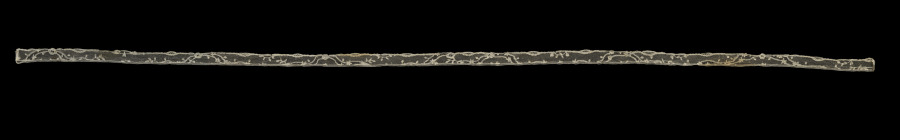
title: Lace Edging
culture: Belgium, Brussels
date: 1700s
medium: Bobbin lace with appliqué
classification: Lace